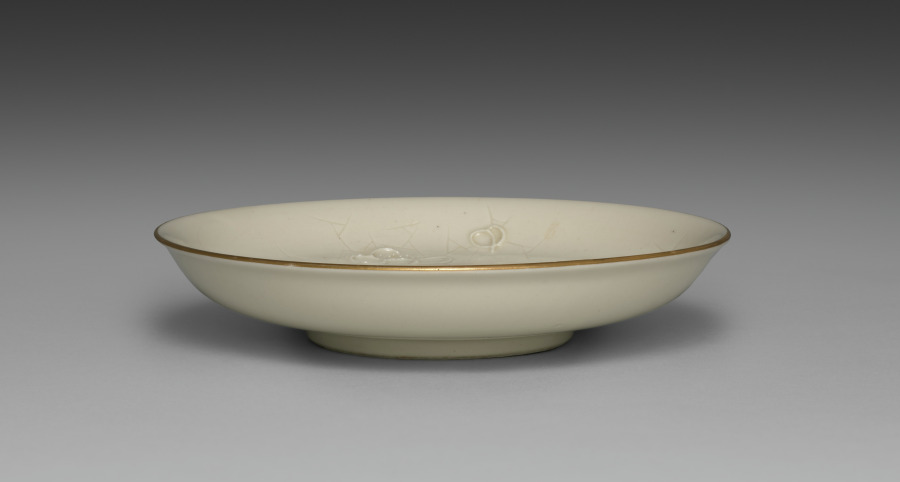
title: Medium-sized Dish from Dining Set with Plum Blossoms and Cracked-Ice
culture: Japan, Meiji period (1868–1912)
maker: Seifū Yohei II (Japanese, 1844–1878)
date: c. 1875–78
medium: Porcelain with molded designs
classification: Ceramic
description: Each item in this set has a delicate low-relief design of flowering plum branches over scattered, intersecting lines meant to resemble the cracked-ice surface of a frozen body of water and is signed on the base in gold pigment. While Yohei II produced many fine works in underglaze blue, like those produced by Kiyomizu Shichibei, he also made works in quite different styles later in his career, from the early 1870 s. In 1873, he was appointed purveyor to the Industrial Center of Kyoto Prefecture, a designation associated with Kyoto’s efforts to reach an international market through the port of Kobe; and from 1875 until his death, he was involved in national-level projects to present Japanese ceramics across the world. It was during this period that Yohei III was apprenticed to Yohei II, and it has been suggested that this set may in fact be an early example of Yohei III’s work, which he signed with his teacher’s name. Decorated with flowers resembling Japanese textile motifs, the set calls to mind the design of Yohei II’s pair of vases with plum blossoms in the Victoria and Albert Museum. Here, the elaborate trees created for a formal public exhibition setting have been translated into the approachable blossoms of the genteel domestic environment. While the designs are consistent across the pieces, each raised flower petal and pistil and each incised line in the ice was done by hand, so the cups, bowls, and dishes are similar yet unique. The bottoms of two boxes once identified the set’s owner, but the information has been deliberately obscured with black ink. However, inscriptions still visible appear to indicate two occasions, once at the end of July 1886 , and once again in June 1916 , when parts of the set were requested from Hokura in Niigata Prefecture. The location corresponds to a neighborhood in the present-day city of Jōetsu. The surname Tsuji 辻 also appears on a paper tag affixed to one of the box cloths. Future research may possibly reveal more about their provenance. A vase by Yohei III in a private collection combines the formal grandeur of the Yohei II vases in the Victoria and Albert Museum with the gentler design of this dining set, placing flowering plum trees against soft, scalloped-edge clouds resembling those in golden screens.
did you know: The dining wares have a creamy white coloration that the four boxes containing them identify as Korean in style.